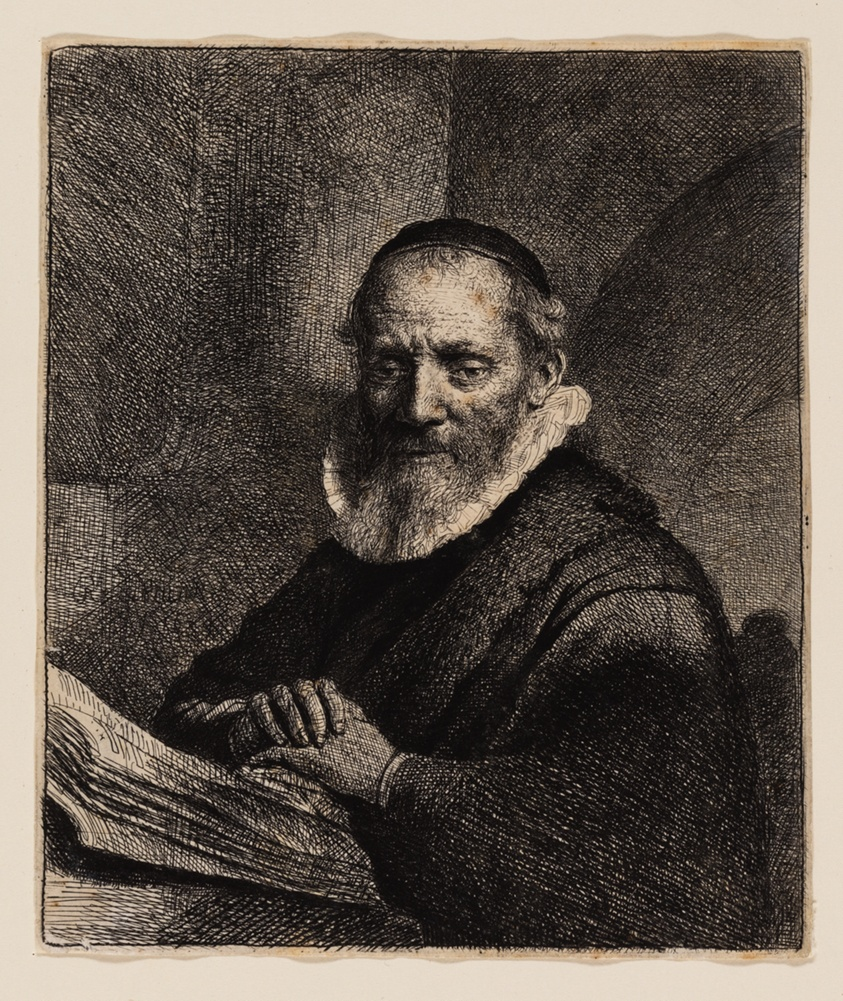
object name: Print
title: Jan Cornelius Sylvius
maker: Rembrandt van Rijn (Dutch, 1606-1669)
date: 1633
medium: Etching on ivory laid paper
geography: Holland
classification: etching; print; prints and drawing; paper